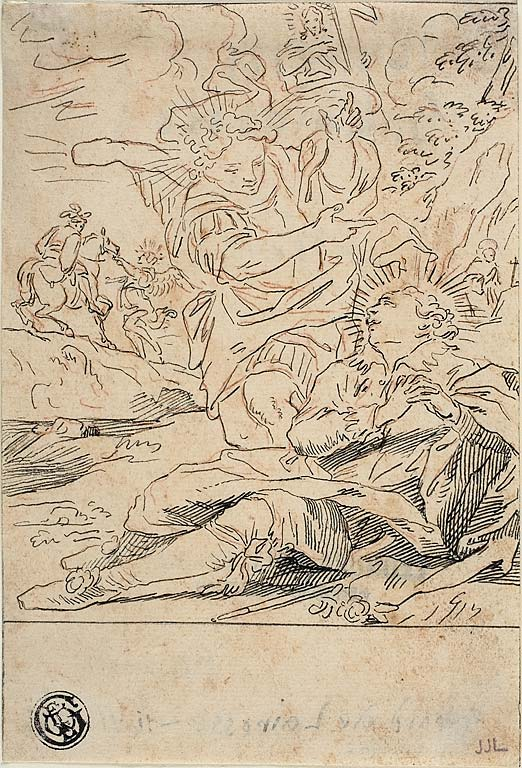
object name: Drawing and Watercolor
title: Angel Appearing to Saint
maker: Gerard de Lairesse (Flemish, 1640-1711)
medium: Pen and brown ink, over red chalk, on buff laid paper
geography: Flanders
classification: pen and ink drawings; drawings (visual works); prints and drawing